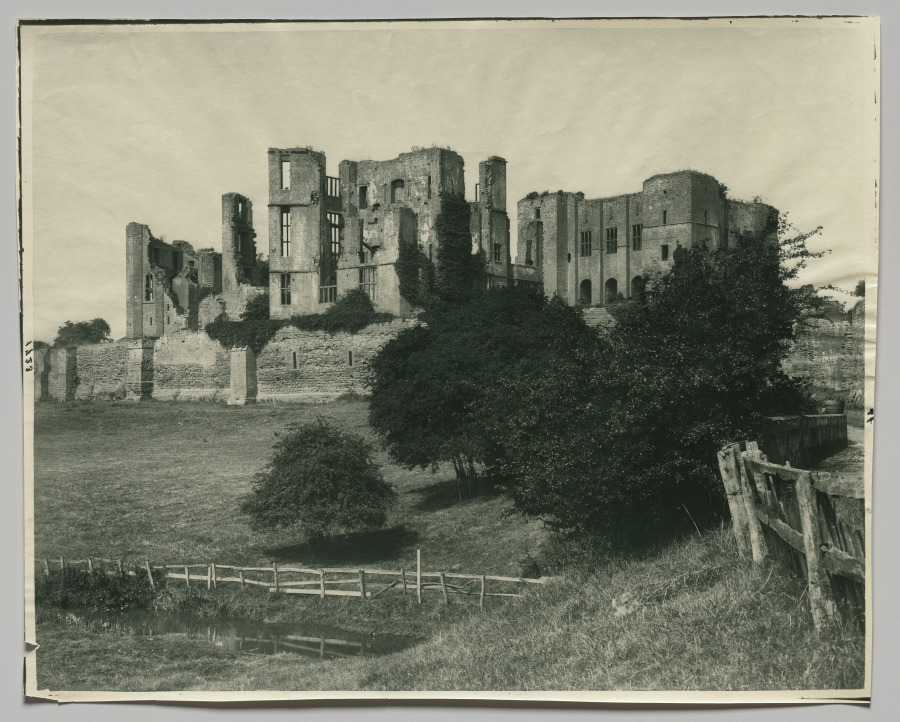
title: Kenilworth Castle, Warwickshire, England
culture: France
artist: Adolphe Braun (French, 1812–1877)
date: c. 1870s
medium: mammoth untrimmed carbon print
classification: Photograph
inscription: Set of numbers imprinted in margin on recto, left side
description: Kenilworth Castle has been a tourist attraction since the late 1700s. It gained an even larger audience when it became the subject of Sir Walter Scott's popular historical romance novel Kenilworth in1821.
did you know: Kenilworth Castle comprises five centuries of English military and civil architecture from a medieval fortress to an Elizabethan palace.